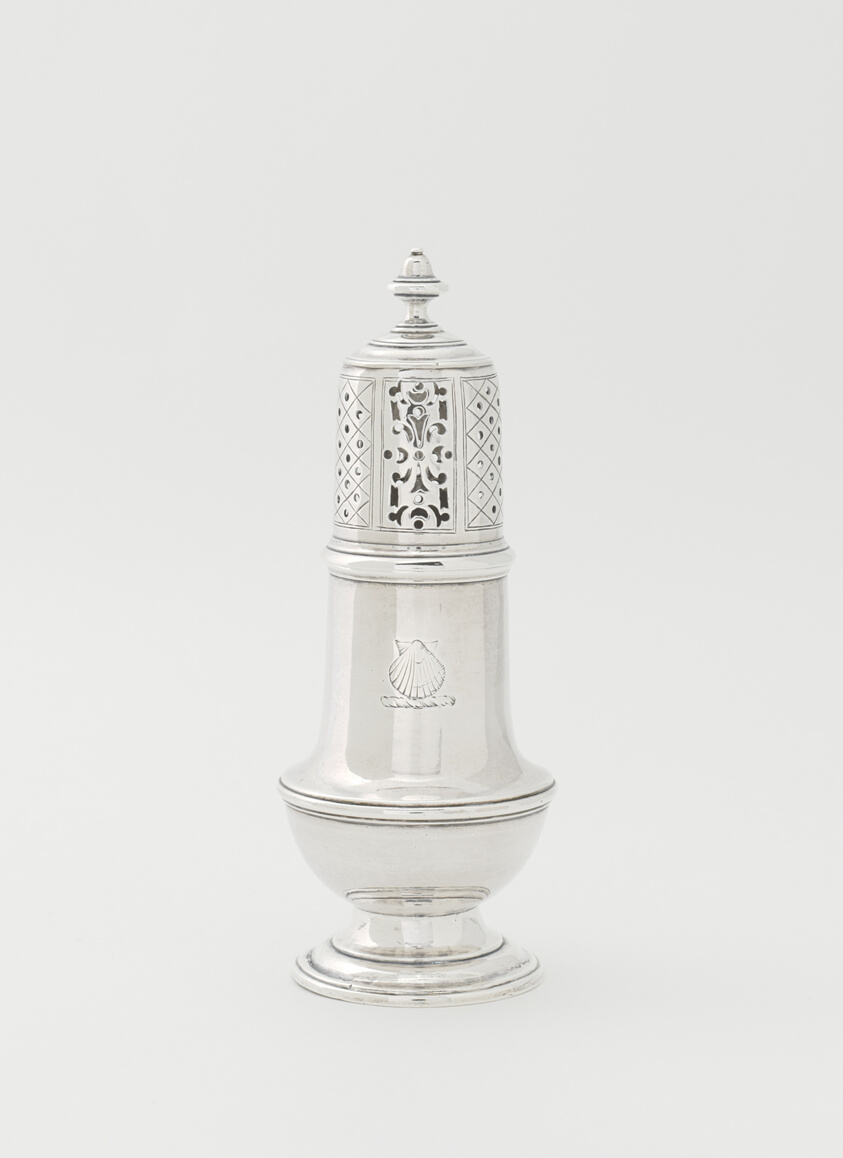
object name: Metalwork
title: Pair of Casters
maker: Attributed to Jacob Hurd; American, 1702/03–1758; Boston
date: 1740–50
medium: Silver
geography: Boston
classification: condiment vessel; silver; american decorative arts; american arts; decorative arts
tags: dining, drinking